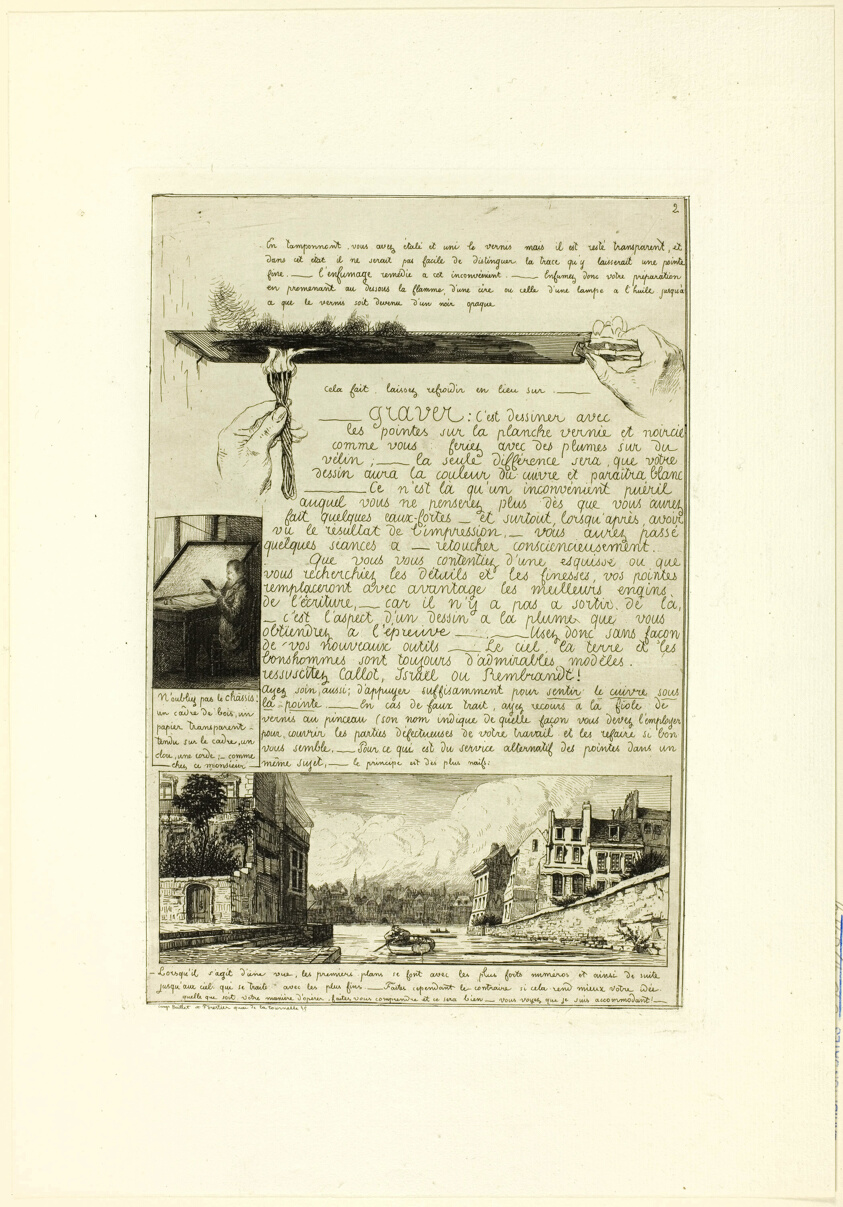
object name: Print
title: Page two, from Letter on the Elements of Etching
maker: Adolphe Martial Potémont (French, 1828-1883); published by Editeurs Cadart & Luquet (French, 19th century); printed by Imprimerie Bullet et Forestier (French, active 19th century)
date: 1864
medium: Etching on ivory laid China paper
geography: France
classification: etching; print; prints and drawing